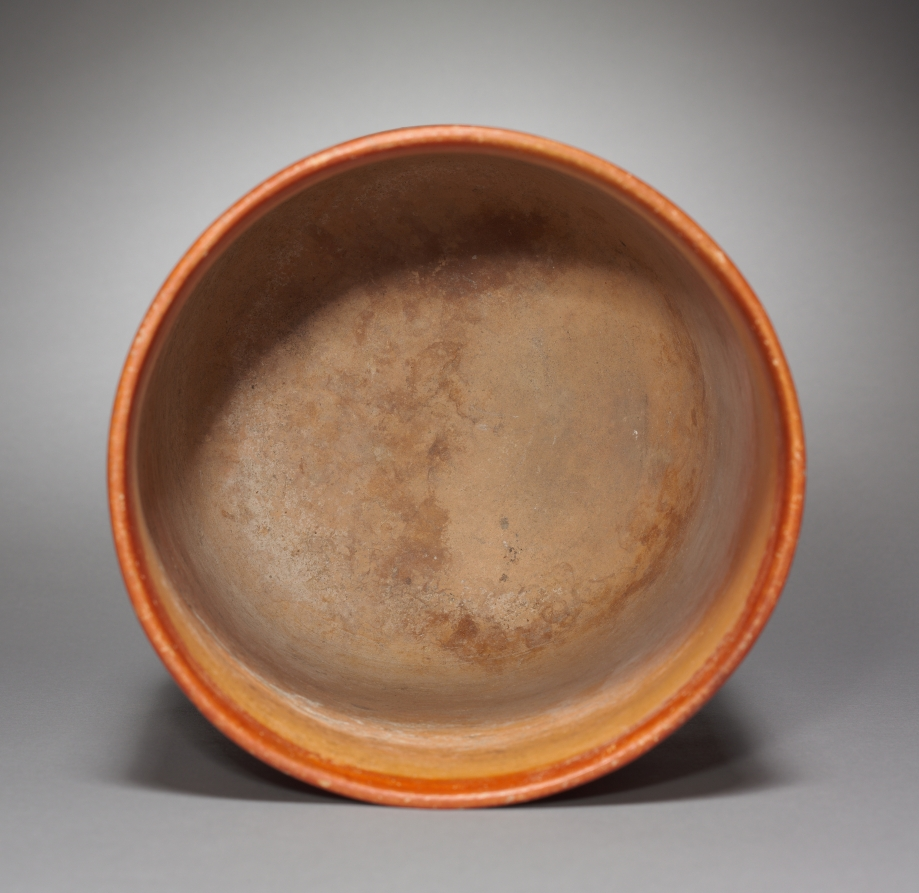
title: Vase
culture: Mexico, Maya, Campeche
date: 250–900 CE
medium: earthenware with colored slips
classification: Ceramic